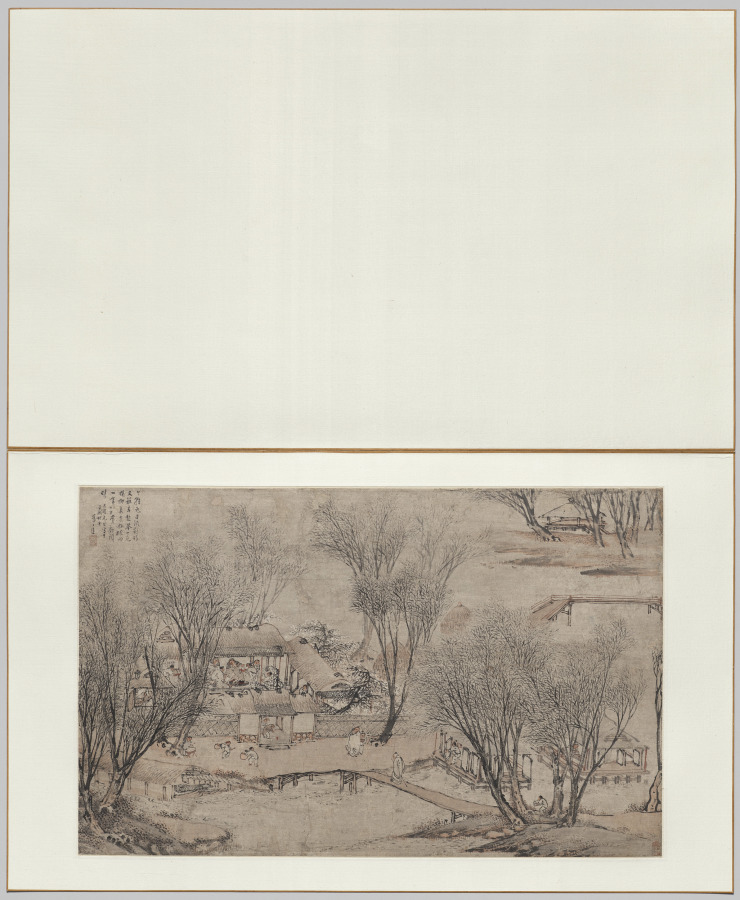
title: New Year's Day in a Village at Stone Lake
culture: China, Ming dynasty (1368–1644)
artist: Li Shida (Chinese, c. 1549–c. 1621)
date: 1609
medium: Album leaf; ink and light color on paper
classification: Painting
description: This rural scene presents typical activities of a New Year’s Day in which relatives and friends approach the house to convey their good wishes to the elders. Two boys in the courtyard light fire crackers, and servants in front of the main gate beat the gong to announce the guests. Inside the house, the hosts entertain their guests by offering hot wine and by writing New Year couplets to be hung on the gates welcoming the New Year. White cherry blossoms announce the spring. The water village at Stone Lake is characteristic of the Jiangnan region in southeast China. Born in Suzhou, the artist Li Shida may have even had his hometown in mind when he produced this painting.